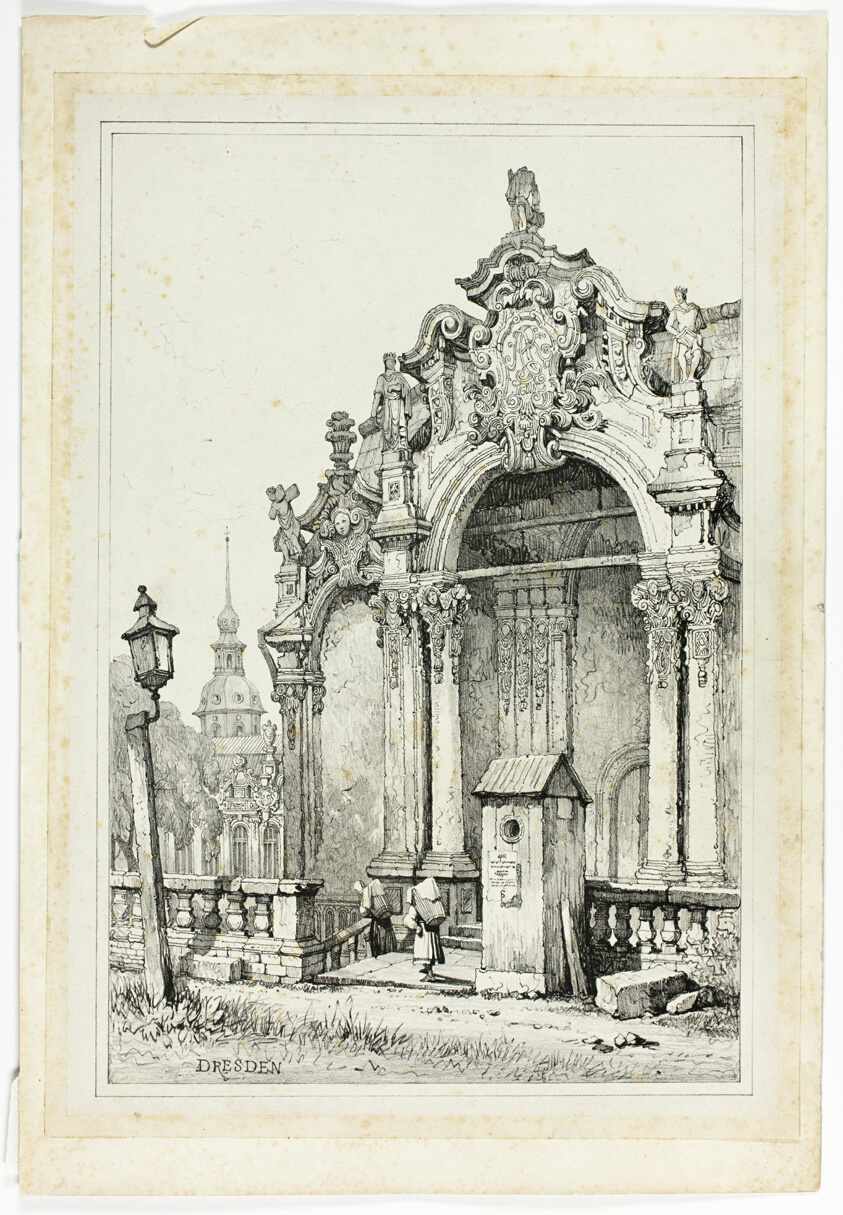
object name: Print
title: The Zwinger, Dresden, from Facsimiles of Sketches made in Flanders and Germany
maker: Samuel Prout (English, 1783-1852); printed by Charles Joseph Hullmandel (English, 1789-1850)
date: 1833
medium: Lithograph in black on grayish-ivory chine, laid down on ivory wove paper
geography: England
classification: lithograph; print; prints and drawing